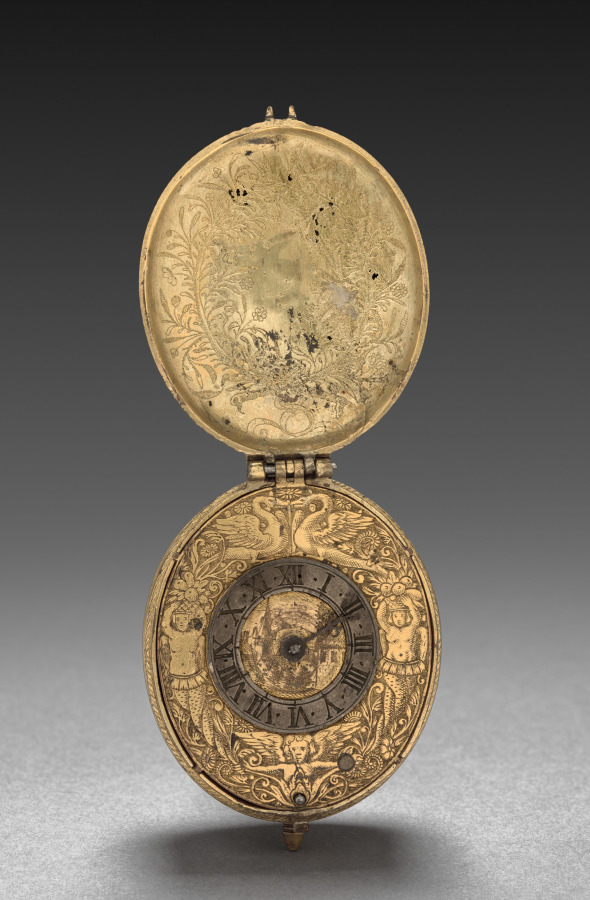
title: Watch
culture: Germany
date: 1600s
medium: gilded metal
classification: Jewelry